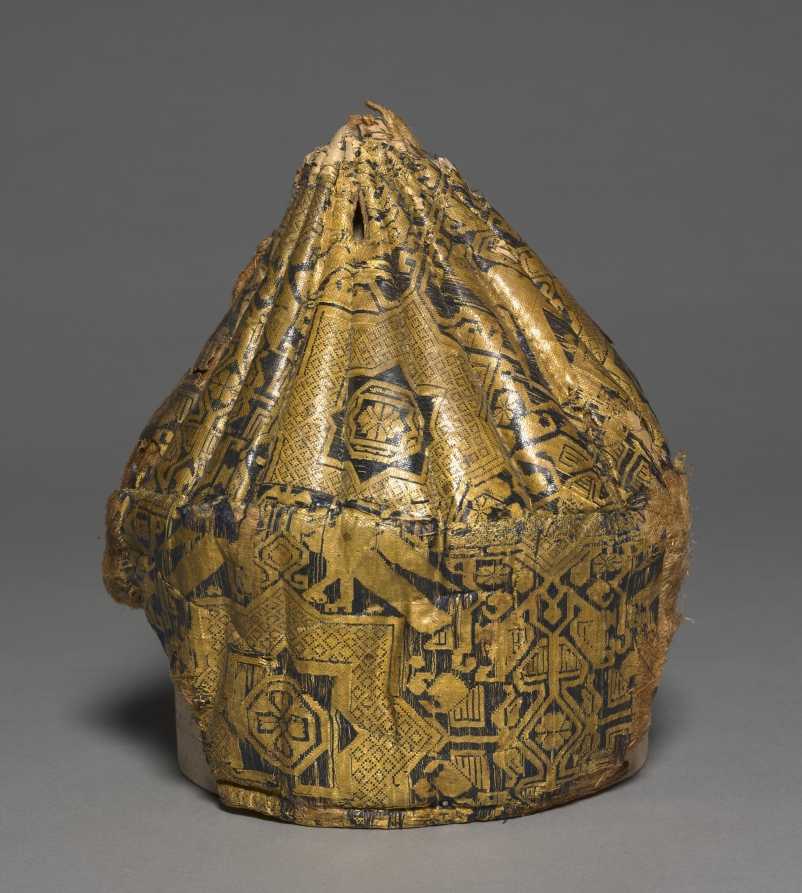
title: Quilted cap with star-patterned silk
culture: Iran or Iraq, Buyid or Seljuq period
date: 1000s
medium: lampas: silk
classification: Textile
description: This quilted hat is one of a number of hats that have been recovered from Egyptian graves. It consists of silk sewn to a heavily quilted form, the top part of which is ribbed. The design of the silk is based on an eight-pointed star with paired birds above and stylized palmettes in the interspaces. Such hats were worn with or without a turban by persons of ranks.